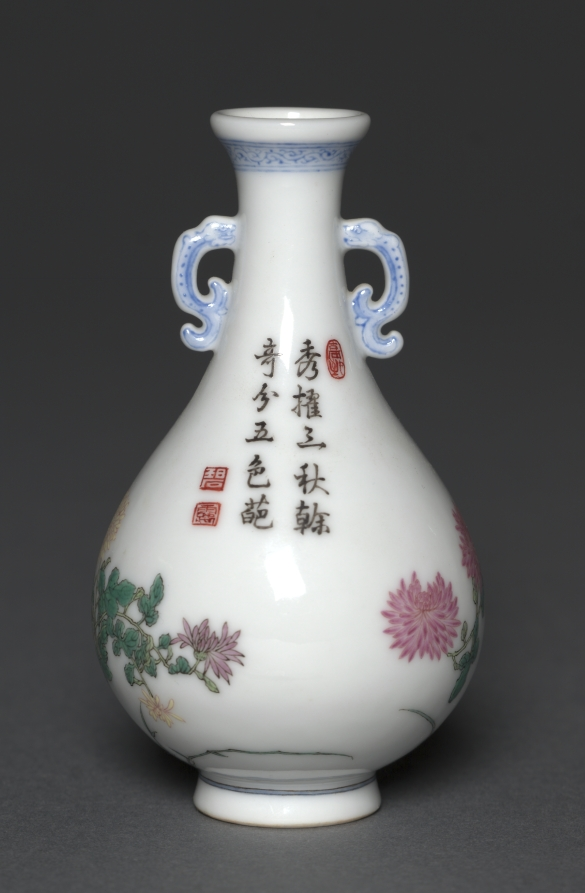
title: Miniature Vase with Birds and Chrysanthemums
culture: China, Jiangxi province, Jingdezhen kilns, Qing dynasty (1644-1911), Qianlong mark and reign (1736-95)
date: 1736–95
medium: porcelain with famille rose overglaze enamel decoration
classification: Ceramic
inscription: 乾隆年製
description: In the Qing dynasty (1644–1911), imperial patronage and a growing urban population encouraged consumption of luxury goods and local craftmanship. Luxury items became more affordable to larger parts of the society, including women, merchants, and literati in nonofficial positions. This miniature porcelain vase with famille rose overglaze enamel decoration illustrates some of the highest technical accomplishments in Qing porcelain production.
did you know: Green, pink, lavender, light lemon yellow, blue, and brown enamels were skillfully applied to this miniature vase.